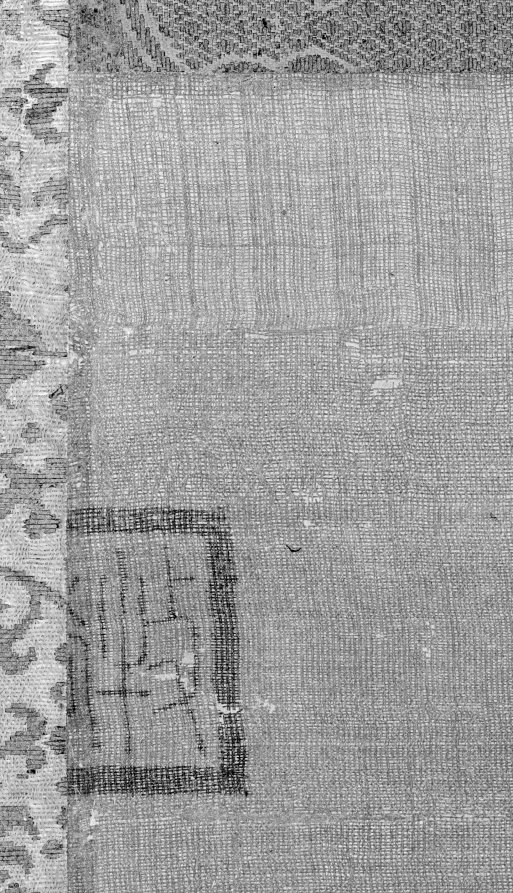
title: Tiger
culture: China, Southern Song dynasty (1127-1279)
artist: Fachang Muqi (Chinese, 1220–1280)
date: c. 1250–79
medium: Hanging scroll; ink and slight color on silk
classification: Painting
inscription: 道有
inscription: 雜華室印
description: The dragon and tiger are tied to the philosophical concept of yin and yang, which describes opposite but complementary forces. The dragon occupies a tiered background of waves and mist. Its luminous head emerges from the darker passages, and its narrow twisting body is serpent-like. By contrast, the close-up view of the tiger emphasizes its bulk. The tiger bends its head to lick its paw while its tail curls in the foreground. In their original Chan Buddhist context, this pair of scrolls likely flanked a central image, like the Bodhisattva Guanyin. The silk has darkened over the centuries, and the slight reddish shading in the tiger’s tongue and nose has faded.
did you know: Fachang Muqi's ink paintings, like this pair, were highly appreciated and collected in Japan.